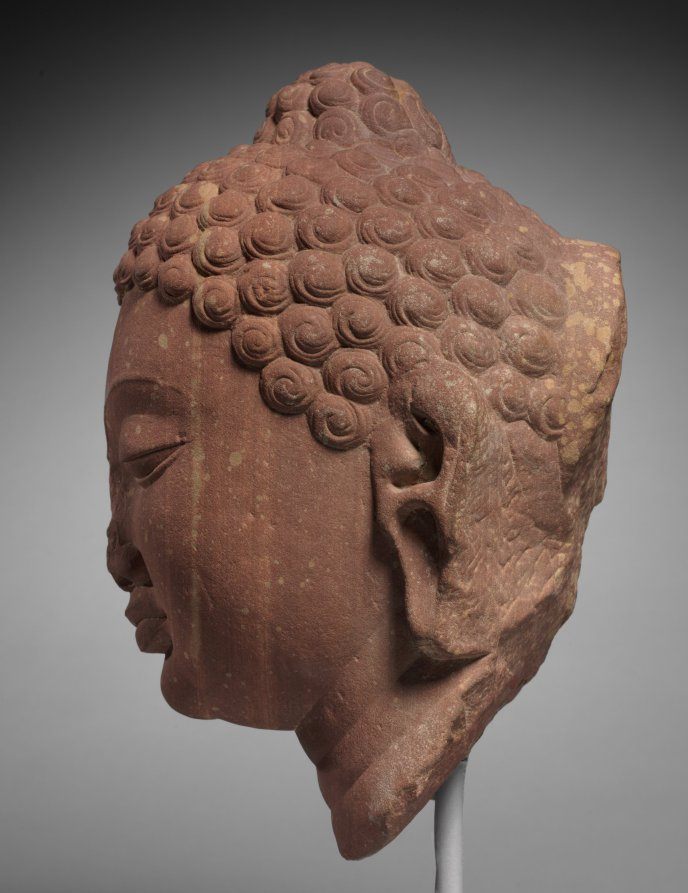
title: Head of Buddha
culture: Northern India, Uttar Pradesh, Mathura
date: 400s CE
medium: sandstone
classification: Sculpture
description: The brows arch with tension and alertness, though the lids are half closed. Short curls cover his head and cranial protuberance, which during this period came to be interpreted as a mark of one who has reached enlightenment, his state of awareness having surpassed the boundaries of an ordinary human being. Sculptors working during the time when kings of the Gupta dynasty (c. 319–550 CE) ruled northern India achieved a balance between fleshy volumes and idealized linear features. This balance led scholars to consider the Gupta period to be a “classical” age of Indian art.